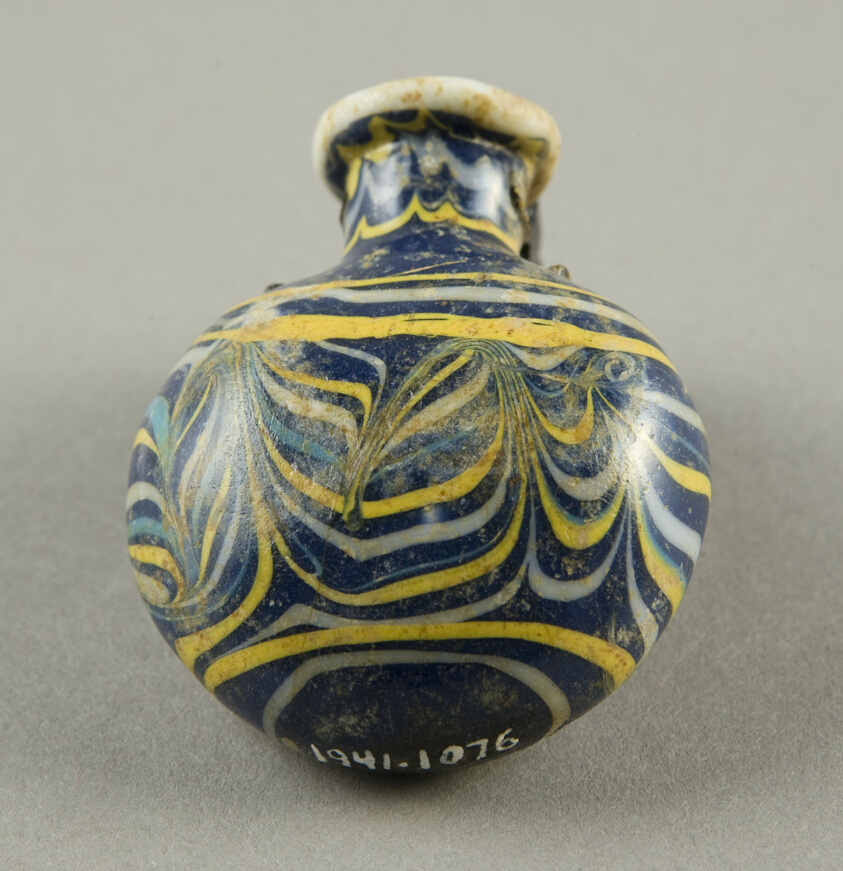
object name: Vessel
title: Flask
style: egyptian, ancient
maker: Egyptian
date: New Kingdom Period, Dynasty 19 (1292–1202 BCE)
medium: Glass, core-formed technique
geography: Egypt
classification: glass; vessel; ancient art; container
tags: dining, drinking